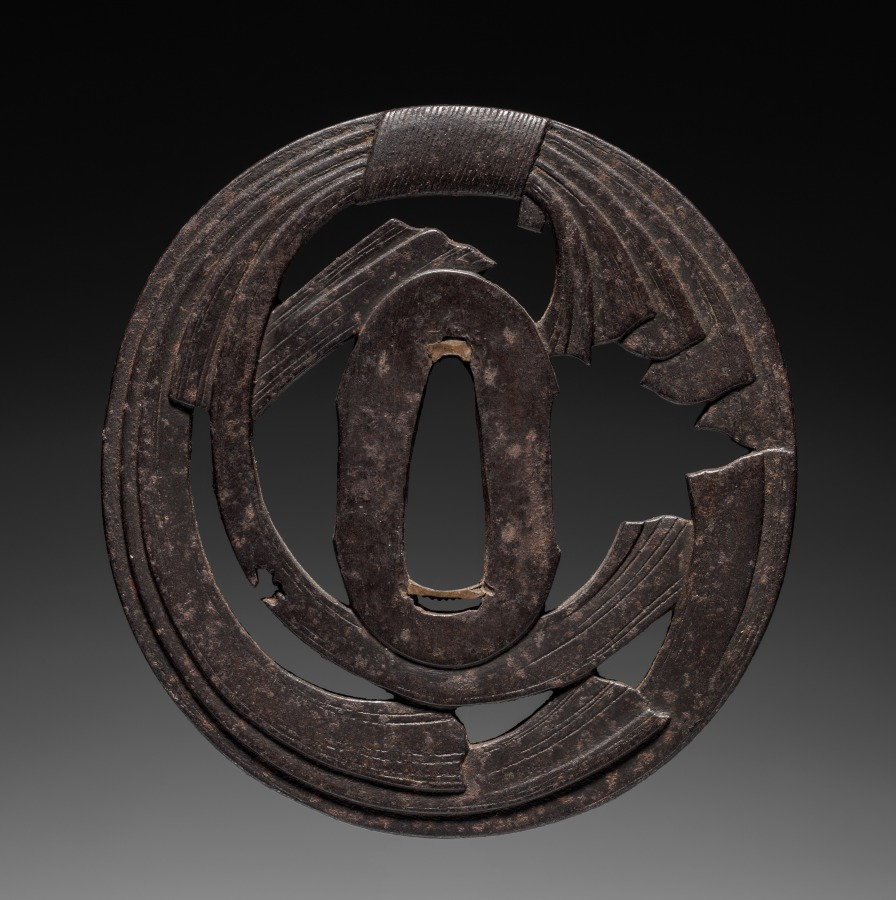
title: Sword Guard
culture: Japan, Edo period (1615–1868)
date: early 1800s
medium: iron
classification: Arms and Armor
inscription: Signed: Mitsuyoshi, residing in Kofu (Edo)